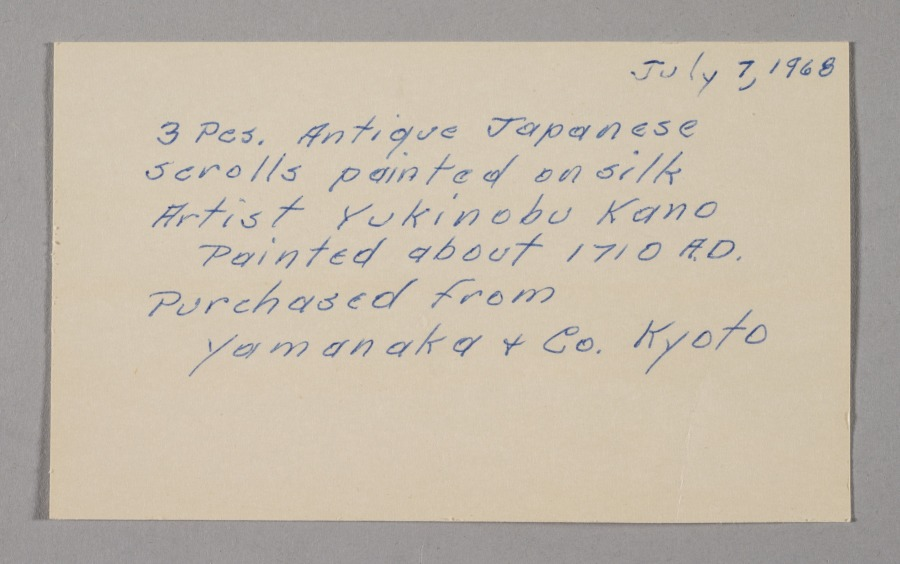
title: Sparrows on Blossoming Plum; A Sage with Tiger; Chinese Bird on Snow-Laden Branch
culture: Japan, Edo period (1615–1868)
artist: Kano Tan’yū (Japanese, 1602–1674)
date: 1661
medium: Triptych of hanging scrolls; ink and slight color on silk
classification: Painting